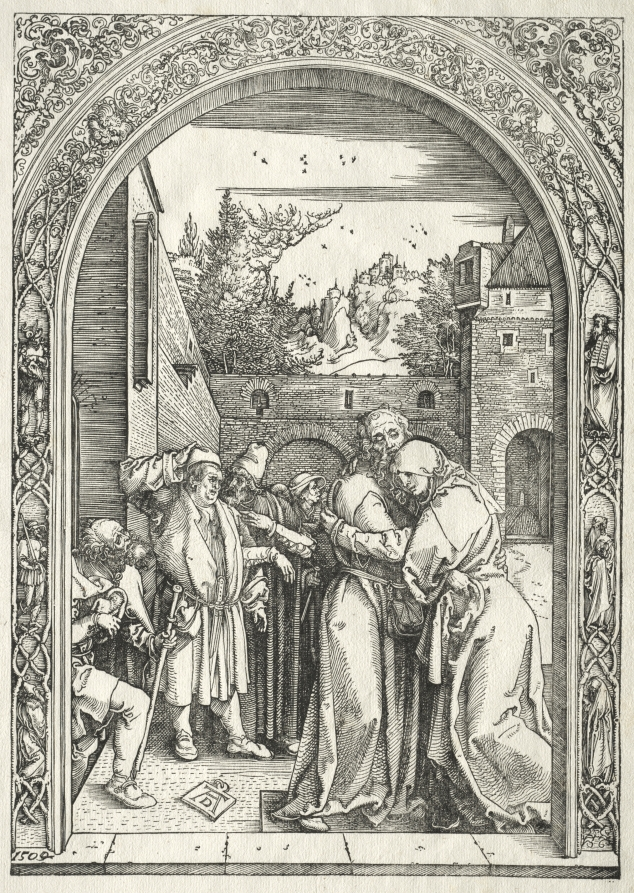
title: Life of the Virgin: Joachim and Anna Embracing under the Golden Gate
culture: Germany, early 16th Century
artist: Albrecht Dürer (German, 1471–1528)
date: 1504–1505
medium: woodcut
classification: Print